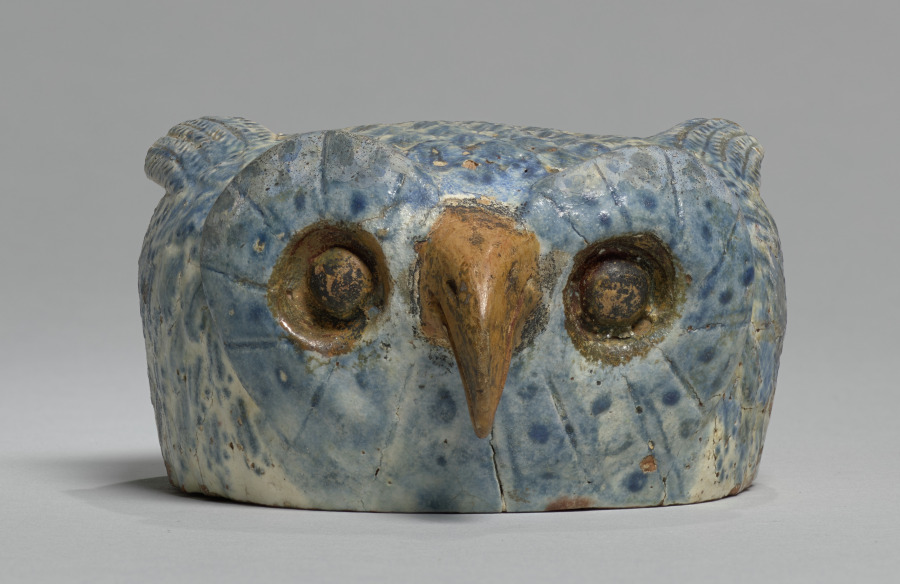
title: Owl (head)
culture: Southern Germany, 16th century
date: 1540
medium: faience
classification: Ceramic